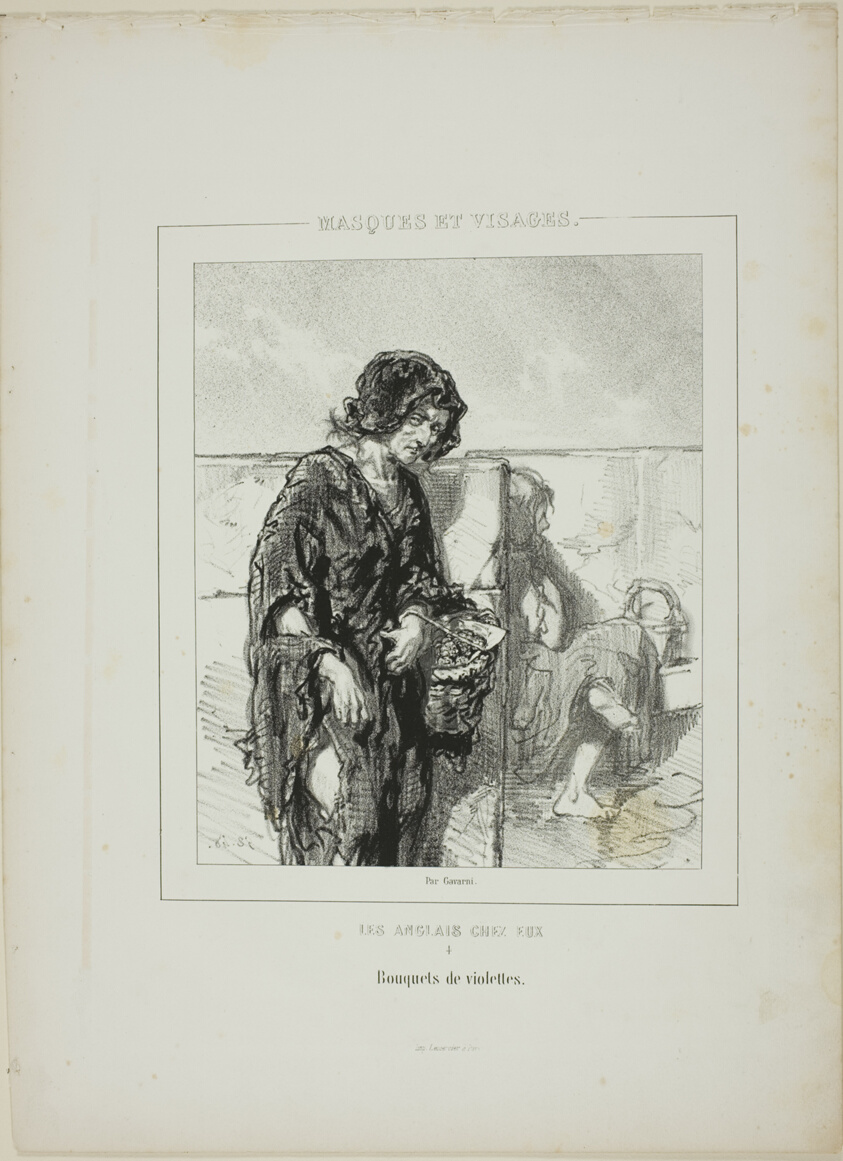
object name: Print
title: Les anglais chez eux: Bouquets de violettes.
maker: Paul Gavarni (French, 1804-1866)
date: 1852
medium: Lithograph in black on cream wove paper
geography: France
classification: lithograph; print; prints and drawing